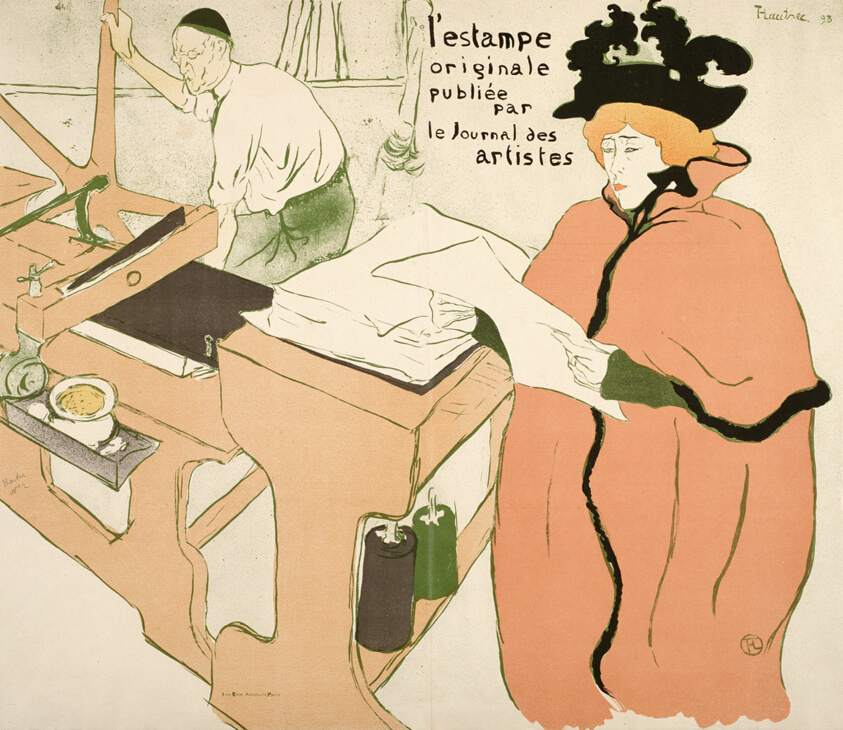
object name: Print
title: Cover for the first album of L'Estampe originale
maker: Henri de Toulouse-Lautrec (French, 1864-1901); printed by Imprimerie Edward Ancourt; published by L'Estampe originale (French, 1893-1895)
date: 1893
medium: Color lithograph on ivory wove paper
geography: France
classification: lithograph; print; prints and drawing